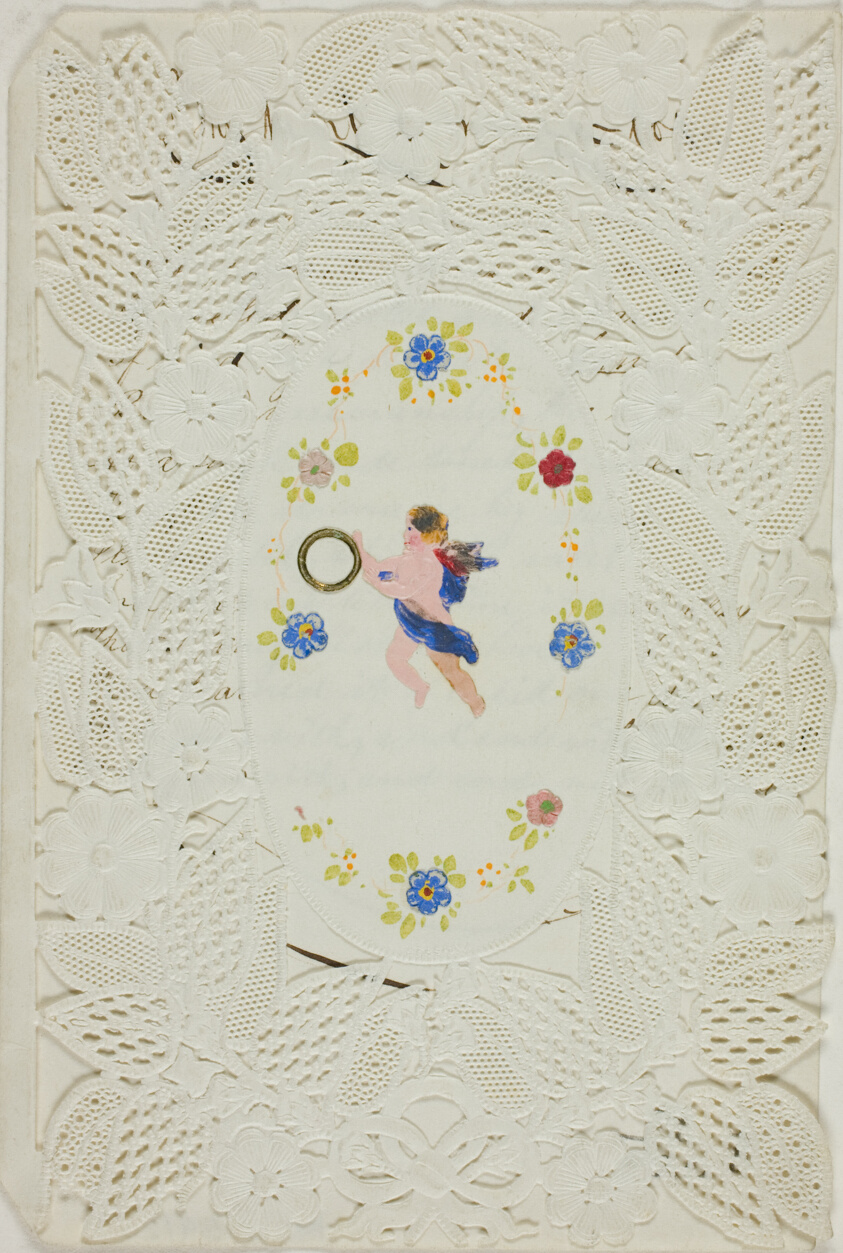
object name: Drawing and Watercolor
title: Thy Heart a Music Box (valentine)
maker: Unknown Artist; American, 19th century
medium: Watercolor on cut and embossed ivory wove paper (lace)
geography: United States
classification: valentine; prints and drawing; paper